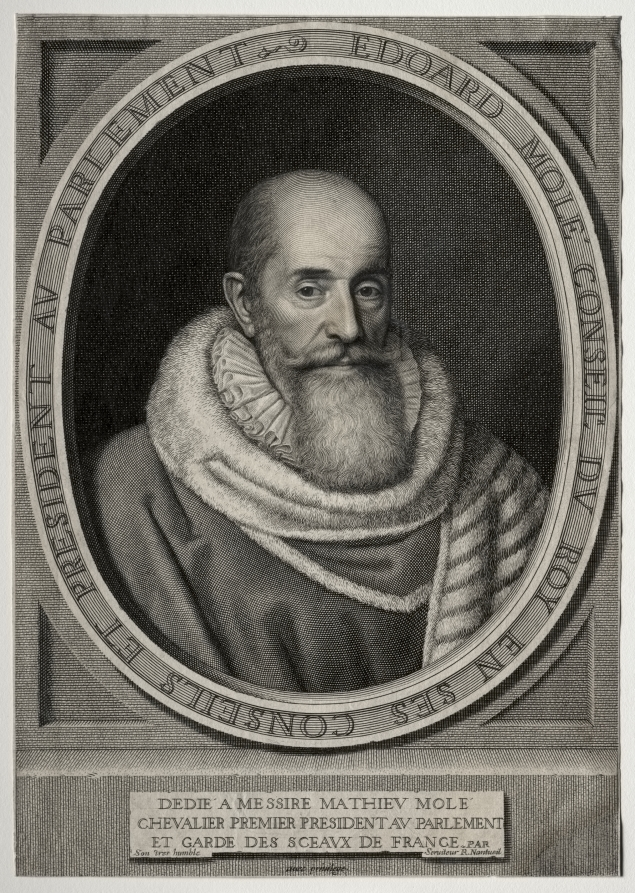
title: Edouard Molé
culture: France, 17th century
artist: Robert Nanteuil (French, 1623–1678)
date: 1653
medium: engraving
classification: Print